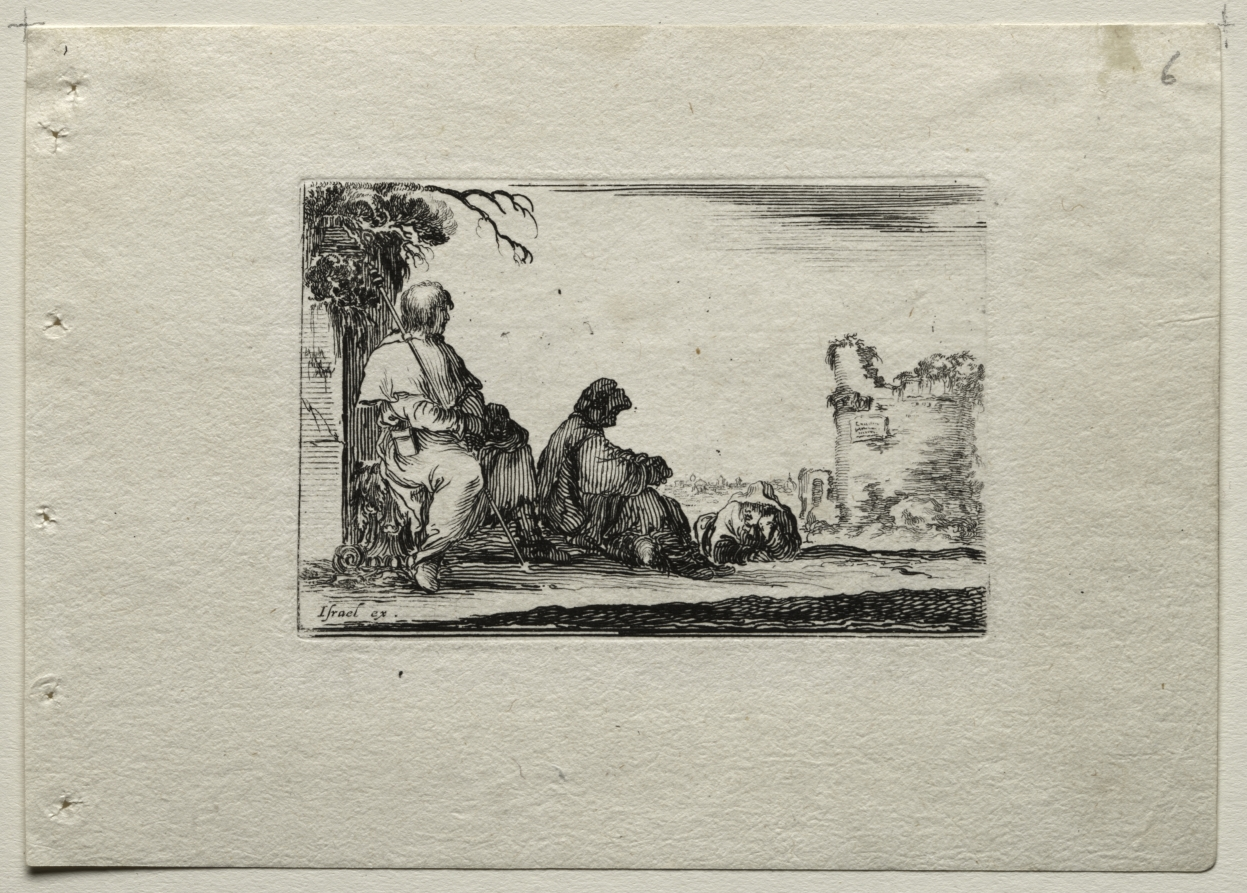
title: Caprices: Two Pilgrims Resting and a Peasant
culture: Italy, 17th century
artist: Stefano Della Bella (Italian, 1610–1664)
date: c. 1642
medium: etching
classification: Print